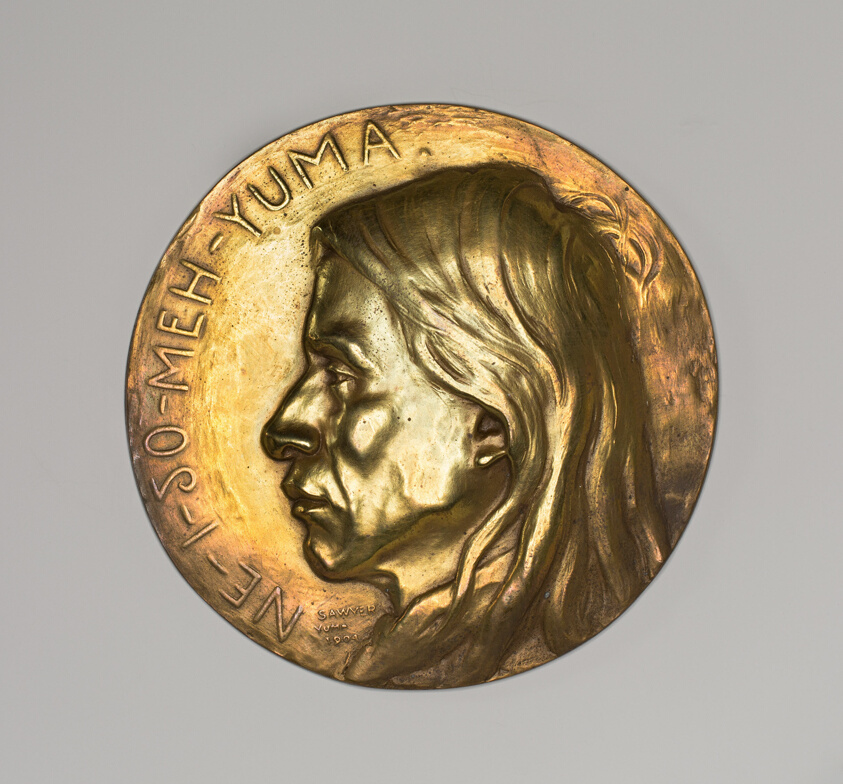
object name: Metalwork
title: Ne-I-So-Meh—Yuma Yuma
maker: Edward Warren Sawyer (American, 1876–1932)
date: 1904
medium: Bronze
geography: United States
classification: medal; american arts; decorative arts